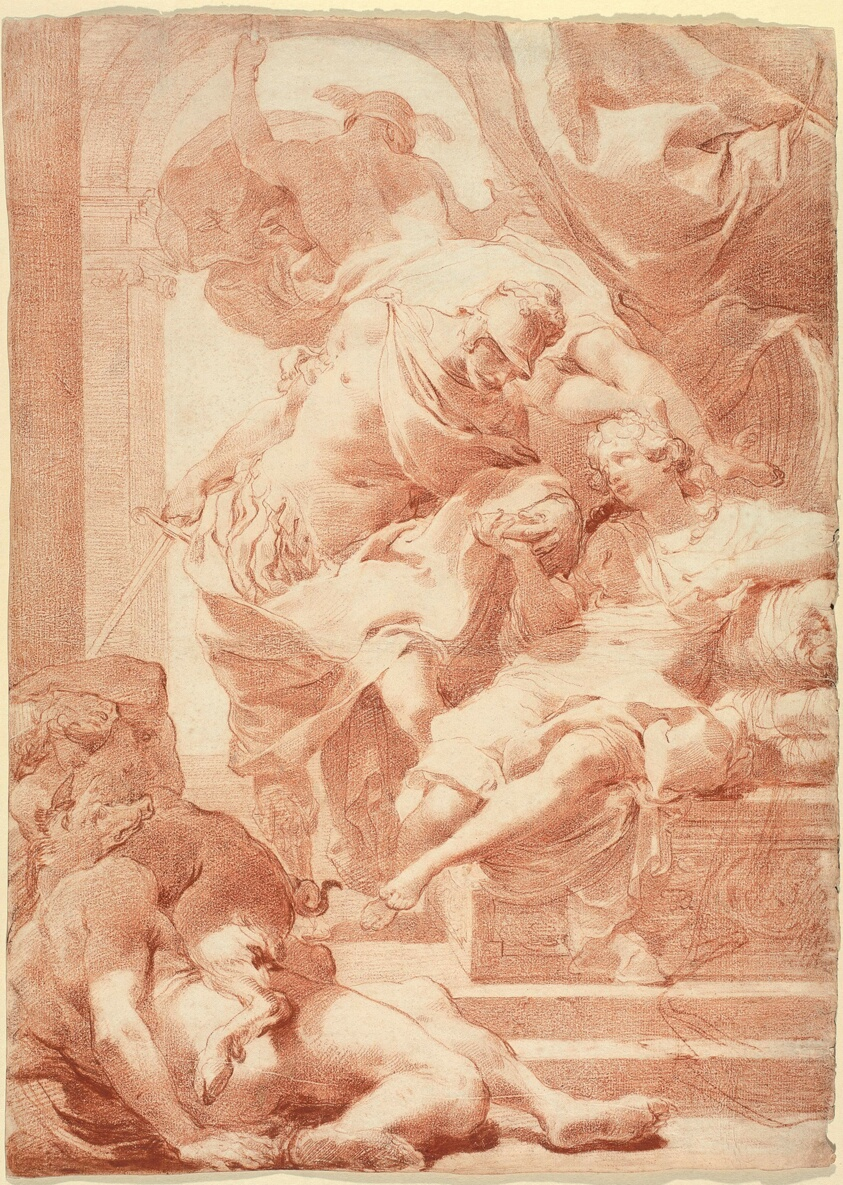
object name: Drawing and Watercolor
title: Ulysses Before Circe, Mercury Behind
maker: Gaetano Gandolfi (Italian, 1734–1802)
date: 1766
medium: Red chalk, with touches of wetted red chalk, on cream laid paper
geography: Italy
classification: drawings (visual works); chalk; paper; prints and drawing